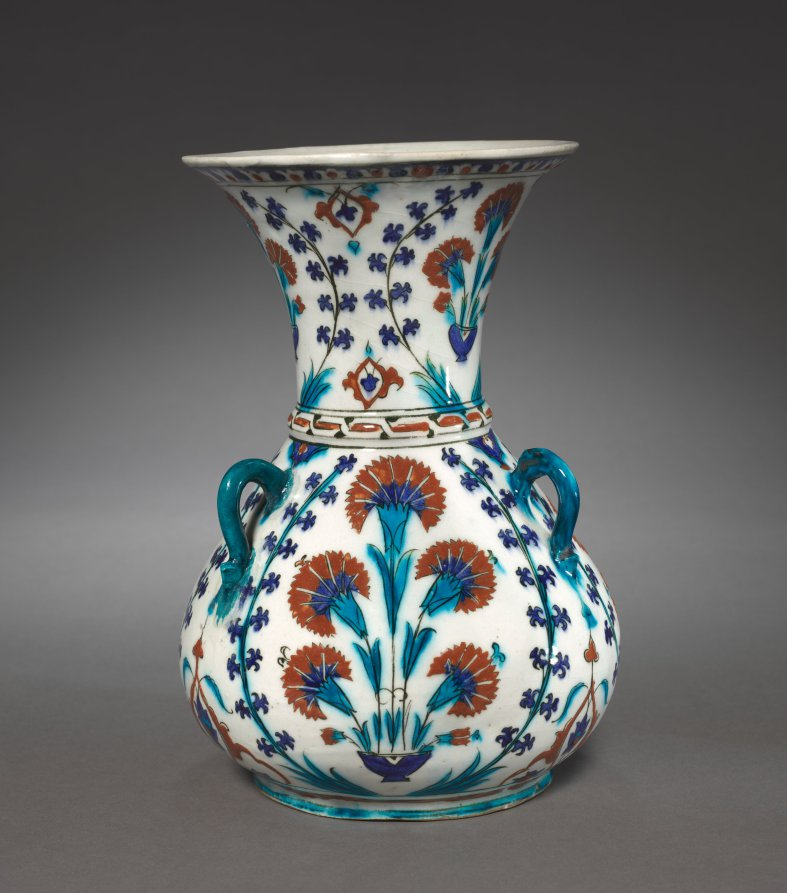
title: Mosque Lamp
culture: Turkey, Iznik, Ottoman period (1299–1922)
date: 1585–95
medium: Fritware with underglaze design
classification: Ceramic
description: Mosque lamps typically functioned as a lampshade, containing an oil lamp inside. Due to the opacity of this Ottoman lamp, it is likely that its primary function was not illumination. Instead, it would have been hung from chains in a mosque or mausoleum to add to the beauty of the space. This lamp is decorated with bright red carnations and blue hyacinths with additional floral and vegetal elements. The turquoise loops would have served for suspension from the ceiling. It is also possible that lamps like this were used as acoustic devices, softening the echo of prayer and discussion within the mosque’s halls.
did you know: Fritware is made of ground quartz, glass frit, and a small proportion of fine white clay to approximate the light color and weight of Chinese porcelain.